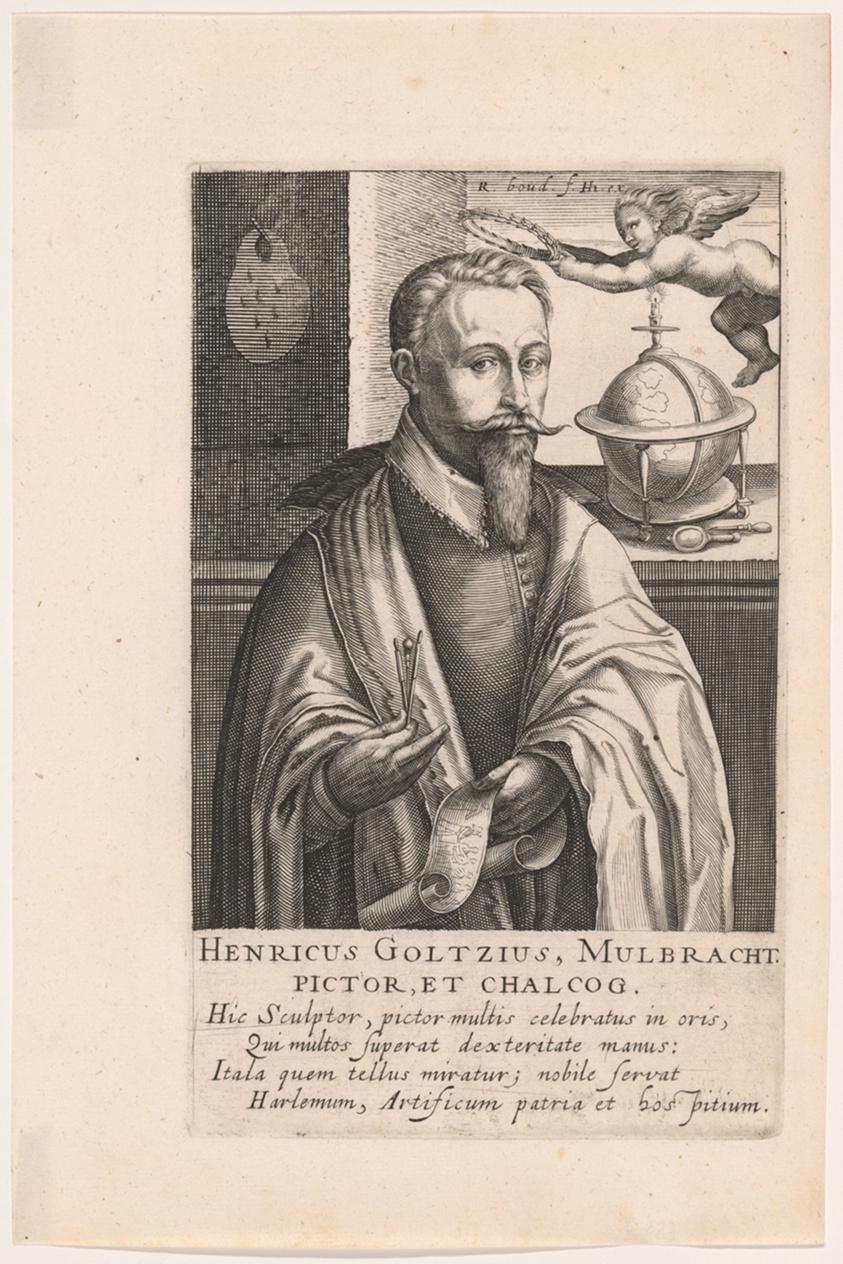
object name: Print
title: Portrait of Hendrick Goltzius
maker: Robert Willemsz. de Baudous (Flemish, born 1574/75-after 1656)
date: 1610/16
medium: Engraving in black on cream laid paper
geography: Flanders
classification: prints and drawing; engraving; paper; print